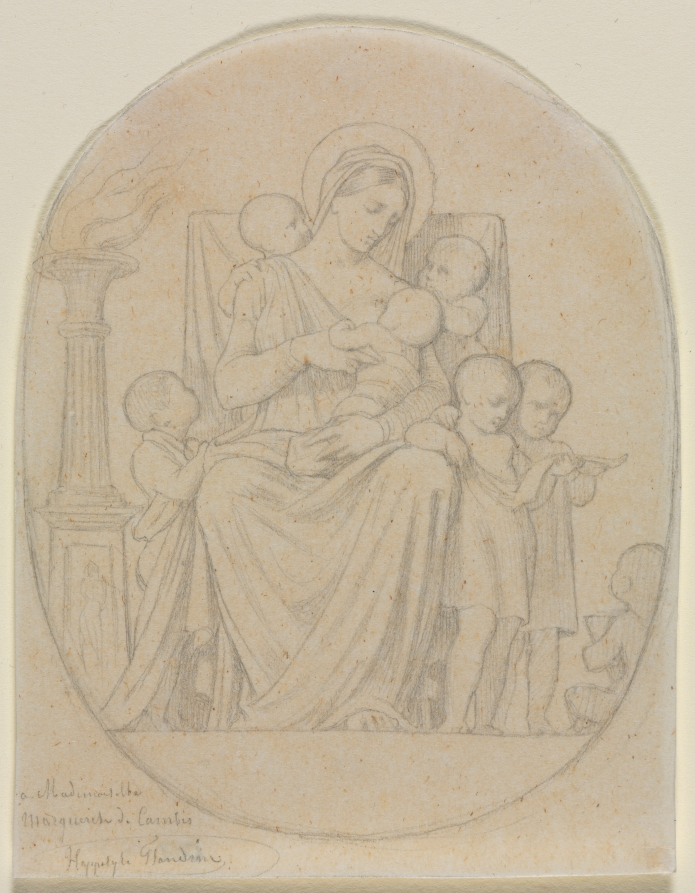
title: Saint Félicité and Her Seven Sons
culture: France, 19th century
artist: Hippolyte Jean Flandrin (French, 1809–1864)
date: second third 19th century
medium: graphite; framing lines in graphite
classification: Drawing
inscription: signed, lower left, in graphite: a Mademoiselle / Marguerite de Cambis / Hippolyte Flandrin [artist's signature circled]